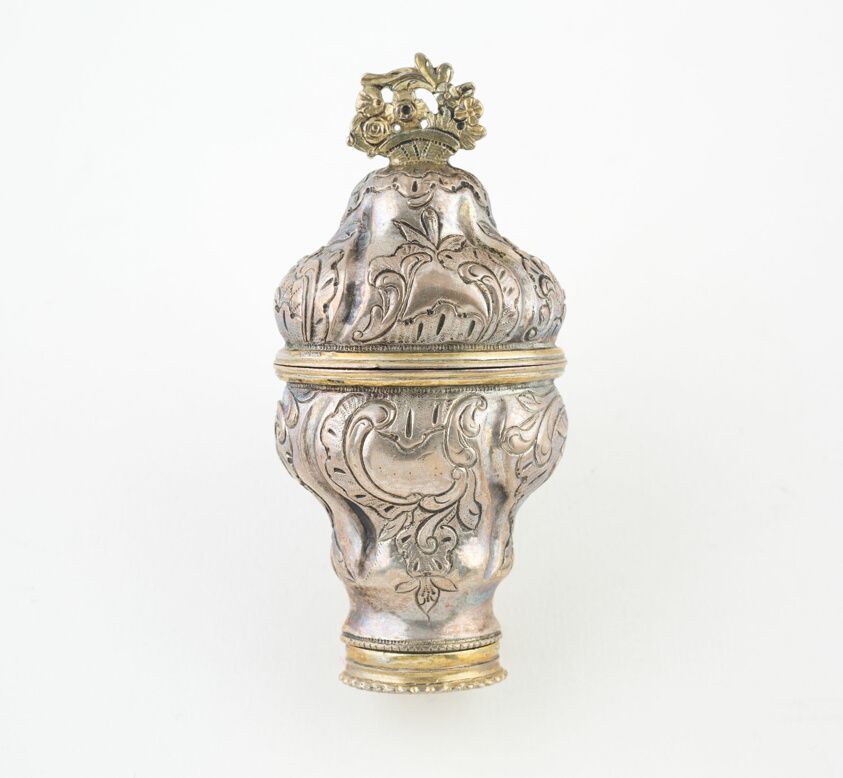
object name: Metalwork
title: Sponge Box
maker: Denmark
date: c. 1820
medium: Silver and silver gilt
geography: Denmark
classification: container for personal use; european decorative arts; metalwork; silver; decorative object/ornament